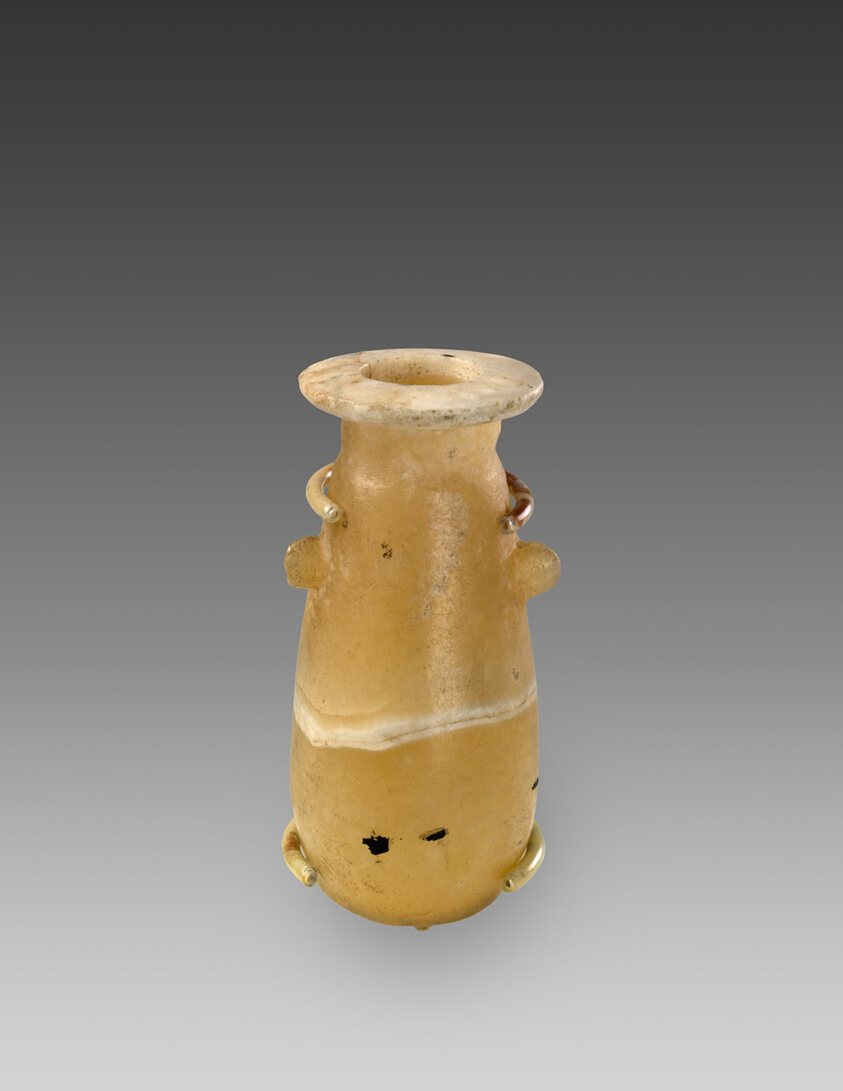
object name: Vessel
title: Alabastron (Container for Scented Oil)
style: egyptian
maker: Egyptian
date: 7th century BCE/1st century CE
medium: Alabaster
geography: Egypt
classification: alabastron; stone; vessel; ancient art